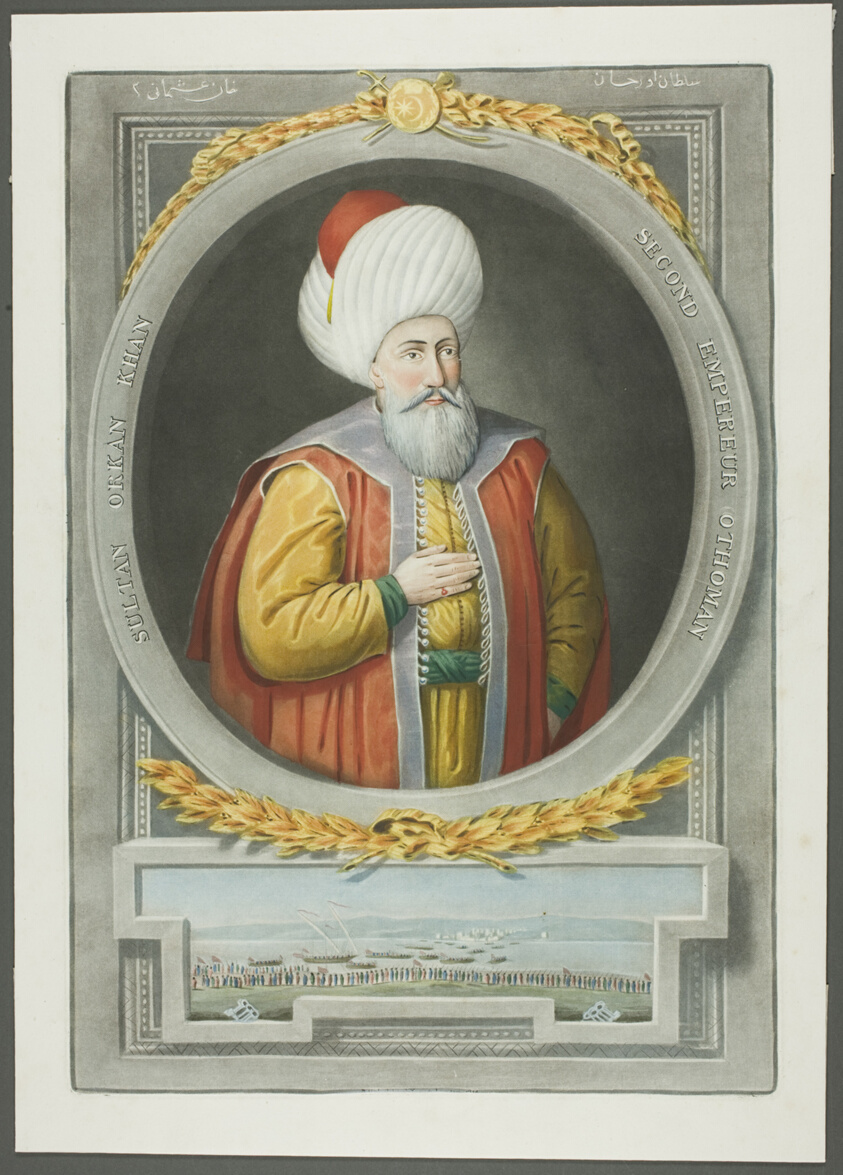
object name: Print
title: Orkan Kahn, from Portraits of the Emperors of Turkey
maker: John Young (English, 1755-1825)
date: 1815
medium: Mezzotint, hand-colored with brush and watercolor, on ivory wove paper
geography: England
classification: mezzotint; print; prints and drawing